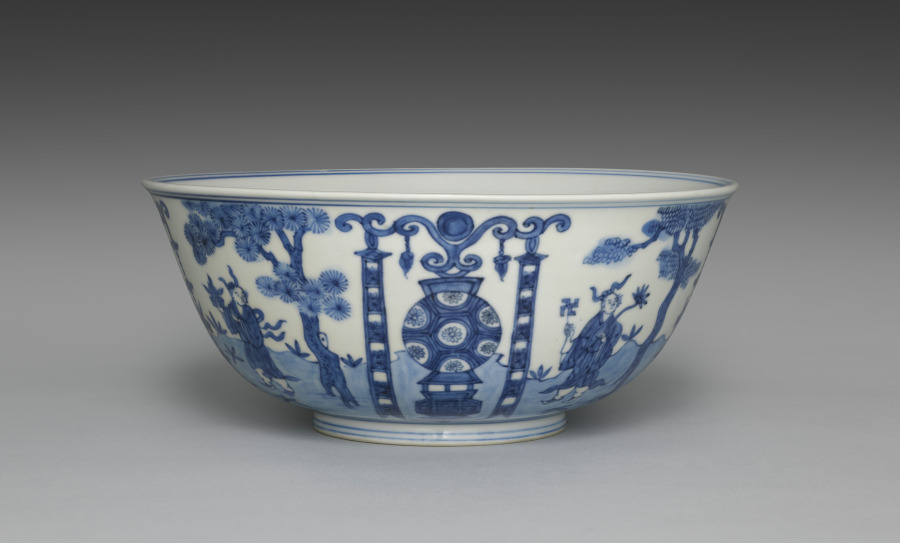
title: Bowl from Nesting Bowls with Daoist Immortals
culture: Japan, Meiji period (1868–1912)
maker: Seifū Yohei III (Japanese, 1851–1914)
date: 1893–1914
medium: Middle bowl from a set of three bowls; porcelain with underglaze blue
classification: Ceramic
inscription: 大日本清風造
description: Yohei III was capable of ink painting–like compositions in underglaze blue, as well as more decorative ones like that on this set of three nesting bowls. Bowls with very similar designs in five colors were produced in the reign of the Wanli emperor (r. 1572–1620 ) during the Ming dynasty, and Yohei must have had direct access to one of these or to a close copy. A scene of Daoist immortals is presented on the bowls. On each one, the ground plane is defined with a blue wash. Four lanterns are evenly spaced around the bowl. Two are flanked with linked-piece metalwork banners of the seven treasures. The alternate altars are adorned with textile banners. In between them are four immortals, each standing beneath a tree with small plants surrounding his feet. Two of the immortals hold fruit on a tray. Another carries an elixir-filled ewer and a willow branch. The fourth holds a swastika (manji), here an auspicious symbol, and a flower. Curiously, the inscription inside each footring reads “Made by Seifu of Great Japan,” in emulation of the dynasty and reign inscriptions that appear on Chinese ceramics; but one can also see through the translucent glaze another inscription, “Seifu Yohei,” written in large characters within a double band of blue on the largest bowl.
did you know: In the bottom of each bowl is a scene of two robed immortals who appear to stand on a precipice in a mountainous landscape high in the clouds, with celestial orbs over their heads.